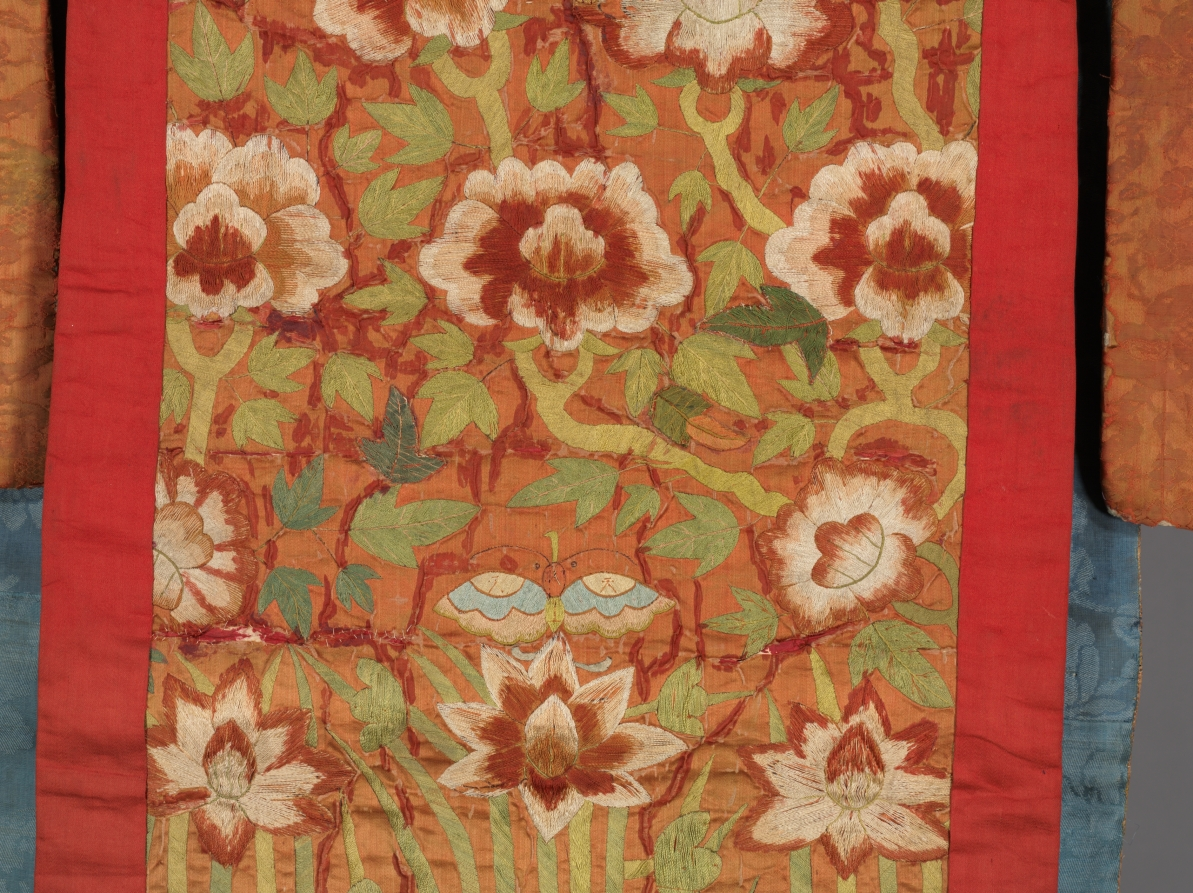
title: Bridal Robe (Hwarot)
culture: Korea, Joseon dynasty (1392–1910)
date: 1700s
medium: Satin weave silk; silk embroidery; paper edging on neck and sleeves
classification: Garment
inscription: [二姓]之合 / [百]福之源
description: This bride's robe is exquisitely embroidered with various symbols of happiness in colorful silk threads. Butterflies stand for marital happiness; the phoenix, numerous offspring; and lotus flowers and white cranes, longevity. Yet, the bridal robe does not attest to the life of luxury. To the contrary, many traces of repairs, trimmings, and patchwork reflect Joseon period women’s commitment to value neo-Confucian aesthetics of frugality and modesty. Substantial repairs and patching reveal that this robe served as an important communal resource to be shared and passed down through several generations. Its collar and sleeves are covered in thick white paper; this paper is replaced with new paper for each bride, while the robe itself was reused for decades.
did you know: This bride's robe was not made for one specific bride, but rather was shared and passed down to many brides.